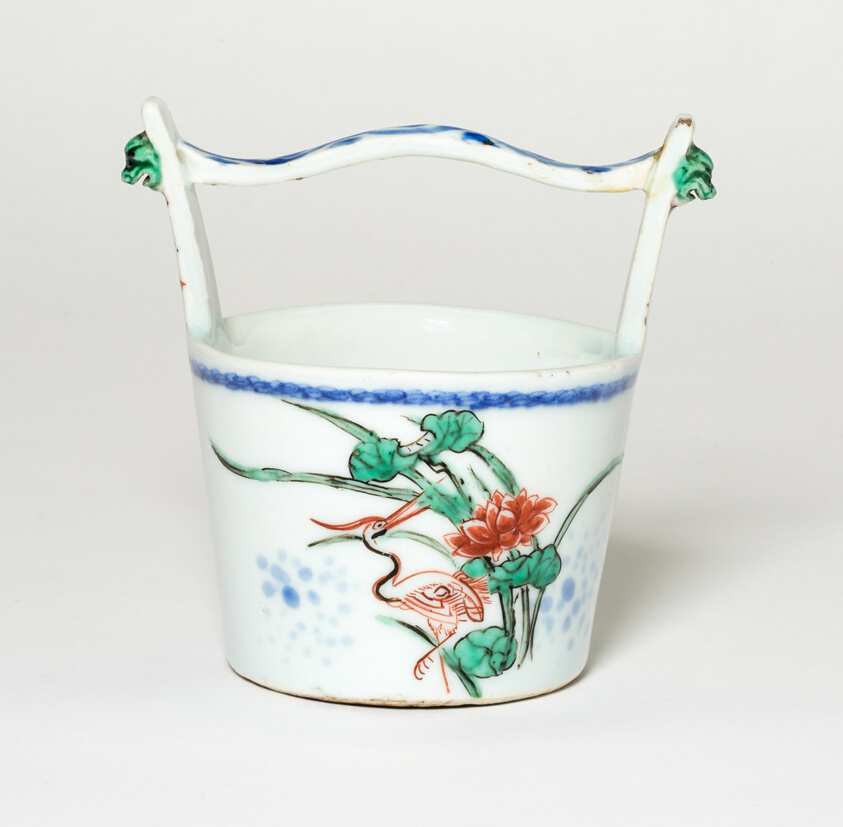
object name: Vessel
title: Miniature Water Bucket with Birds by Lotus Flowers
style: Chinese (culture or style)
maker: China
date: Ming dynasty (1368–1644), Xuande reign mark and period (1425–1435)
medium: Porcelain with underglaze blue and overglaze enamel decoration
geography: China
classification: porcelain; asian art; ceramics; vessel